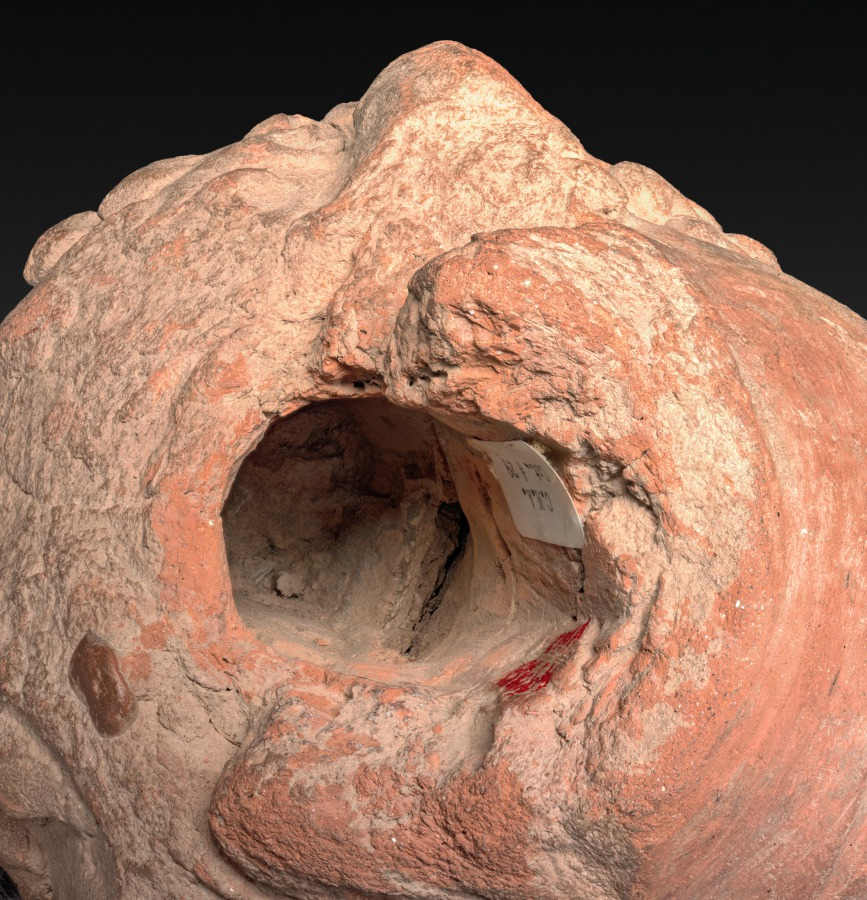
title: Head of Buddha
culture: India, Kashmir, Akhnur school, 8th century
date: 700s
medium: Clay, accidentally burned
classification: Sculpture